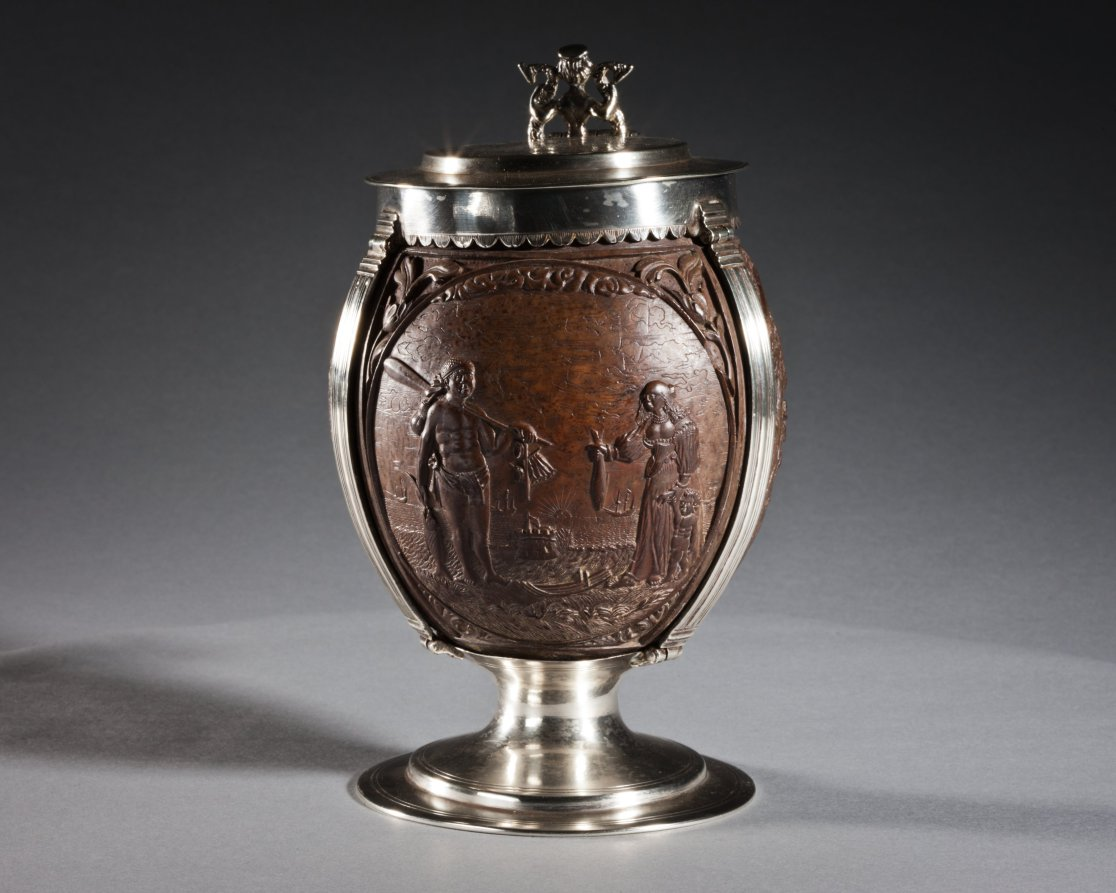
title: Coconut Cup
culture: carved coconut, probably The Netherlands; silver mount, probably England, 17th century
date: c. 1630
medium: carved coconut in silver mount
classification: Metalwork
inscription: top lid has engraved coat-of-arms, underside of lid has inscription: George Lewis TIVERTON Feby, 1st 1760.